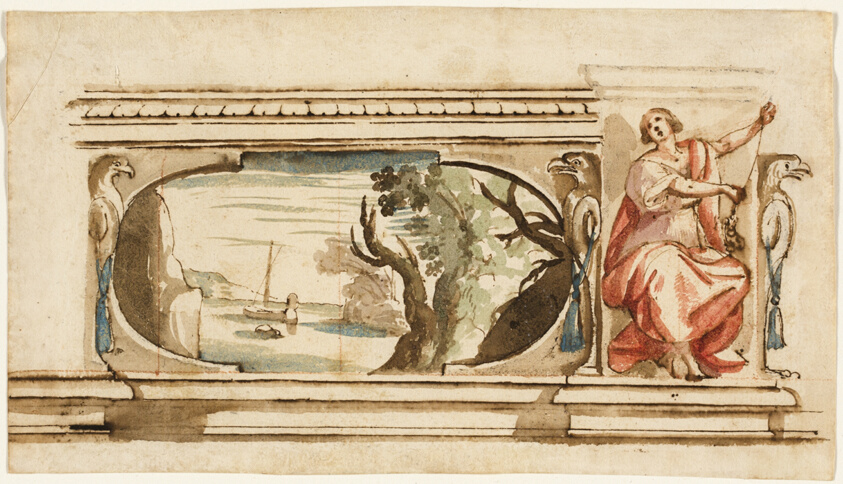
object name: Drawing and Watercolor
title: Study for a Painted Frieze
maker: Flaminio Allegrini (Italian, c. 1587-c. 1663)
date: 1625/27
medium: Pen and brown and gray ink, with brush and brown wash and red chalk wash, with traces of lead white (partially discolored), on tan laid paper, laid down on cream laid card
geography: Italy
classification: ink or chalk wash; drawings (visual works); prints and drawing